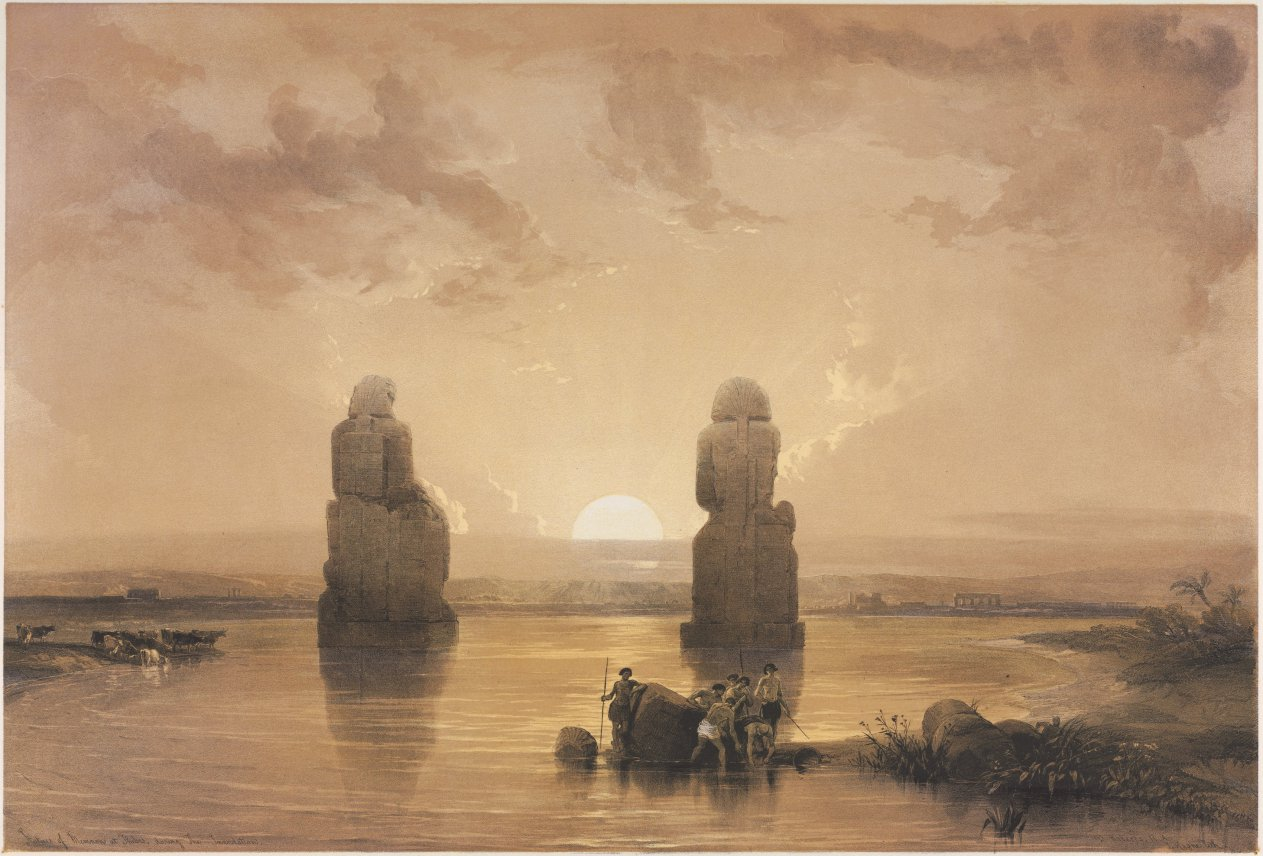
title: Egypt and Nubia, Volume II: Statues of Memnon at Thebes, during the Inundation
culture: England, 19th century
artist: Louis Haghe (British, 1806–1885)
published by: F. G. Moon (British, 1797–1871)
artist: after David Roberts (Scottish, 1796–1864)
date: 1848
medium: color lithograph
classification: Print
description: By the mid 19th century, the complexities of printing in numerous colors had been mastered, culminating in one of the high points of European printmaking. The plates drawn by Haghe, which copy the watercolors that David Roberts made in Egypt, are exquisite examples of color lithography. Egypt was a distant, mysterious country for Europeans and Haghe, a Scottish topographical and architectural artist who spent the year of 1838 traveling across this ancient land. The resulting prints—the first comprehensive series of views of the monuments, landscapes, and people of the Near East—were especially appreciated for their brilliant color and large scale.